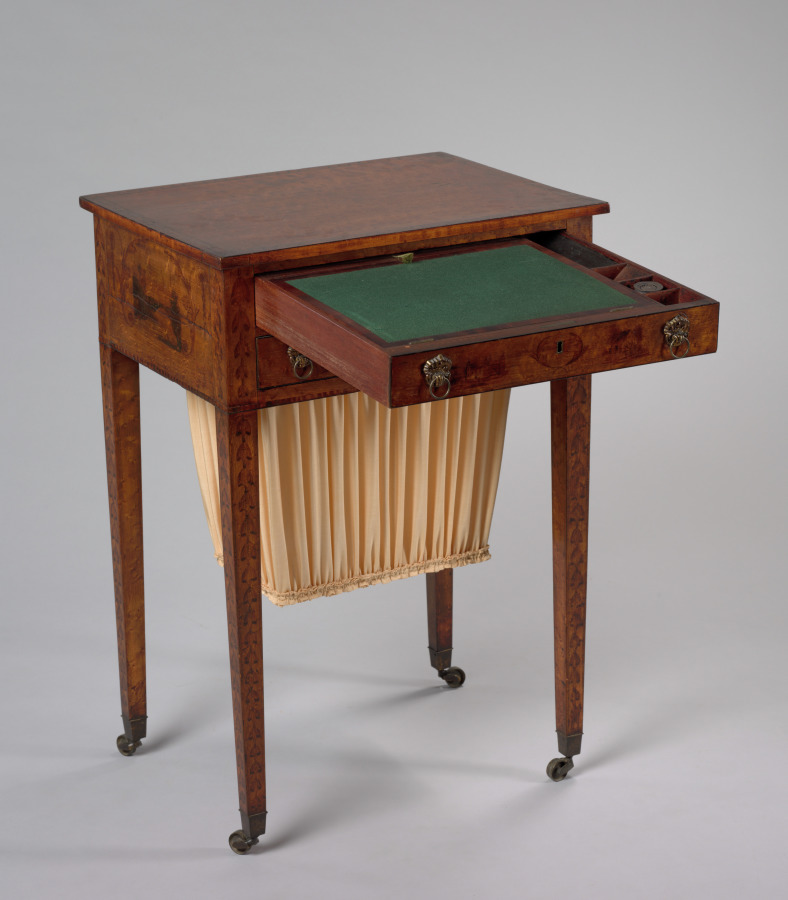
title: Work Table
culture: America, Massachusetts, Boston, 19th century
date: 1800–1825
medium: maple, brass hardware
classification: Furniture and woodwork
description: Needlework typically occupied several hours of a well-to-do woman's day. Worktables are compact, lightweight, and therefore portable. Casters permitted one to move the table around a room and to reposition it easily for sewing or writing. The top drawer of this example was designed to hold writing equipment and contains a writing tablet that could be placed at a convenient slant. The second drawer is divided into compartments for sewing equipment. Needlework was stored in a bag below, accessible by pulling its frame out of one of the table's shorter sides. This simple, small table with its slender, tapered legs is decorated with painted landscapes almost certainly copied from engravings. From about 1800–1825 furniture decoration of this kind was taught in schools for proper young ladies of New England.